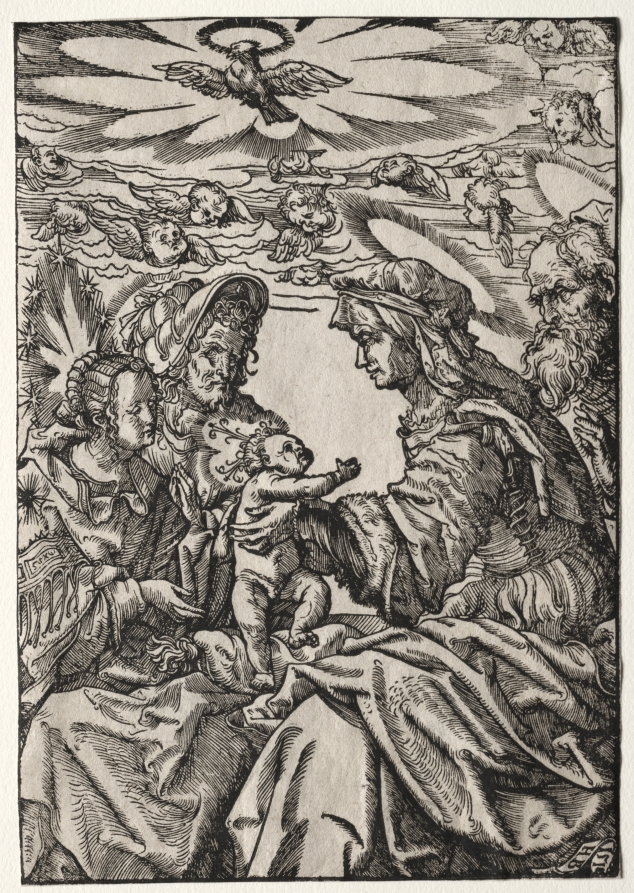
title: The Holy Family with St. Anne and Joachim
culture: Germany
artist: Hans Burgkmair (German, 1473–1531)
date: 1512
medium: woodcut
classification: Print